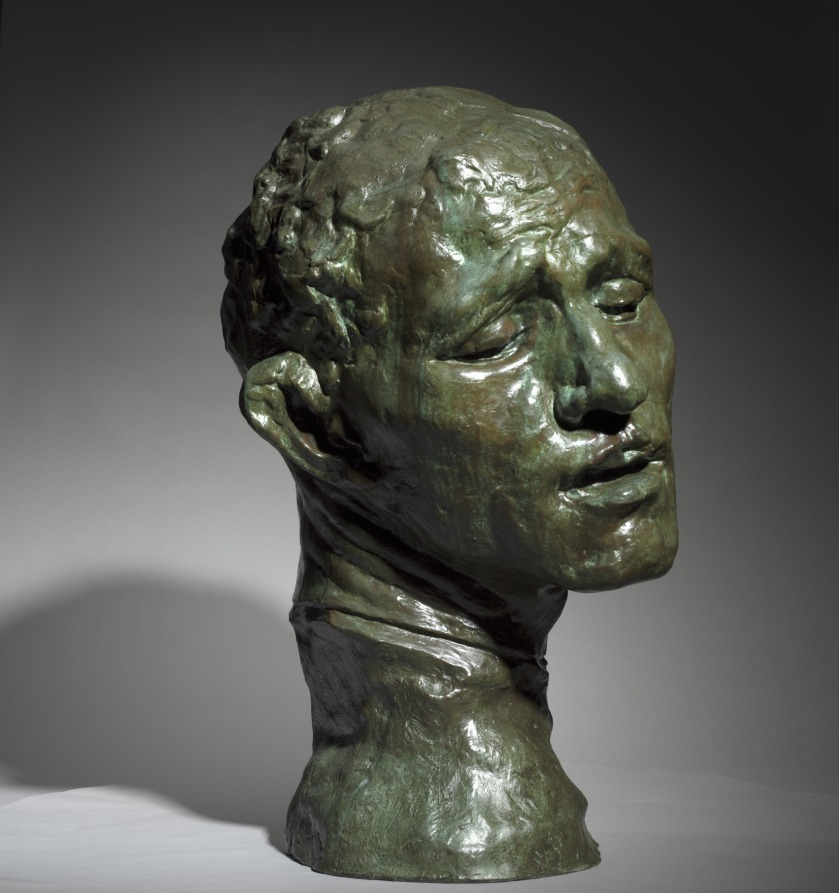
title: Heroic Head of Pierre de Wissant, One of the Burghers of Calais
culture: France, 19th century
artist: Auguste Rodin (French, 1840–1917)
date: 1886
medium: bronze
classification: Sculpture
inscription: inscribed at neck, left: A.Rodin; inscribed lower back: Alexis Rudier/Fondeur-Paris.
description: This sculpture depicts one of the figures in Rodin’s large public monument The Burghers of Calais (1884–89), featuring six French men who volunteered to be taken prisoner by the English in exchange for lifting the siege of Calais during the Hundred Years War (1337–1453). Pierre de Wissant’s anguished expression suggests extreme mental suffering as he contemplates his expected execution. Rodin exhibited a life-size version of the figure as an independent work before completing the monument. He later made multiple versions in various sizes and media.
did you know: This sculpture depicts the head of a figure from Rodin's large public monument The Burghers of Calais (1884-89). The CMA also owns a plaster version of the head.